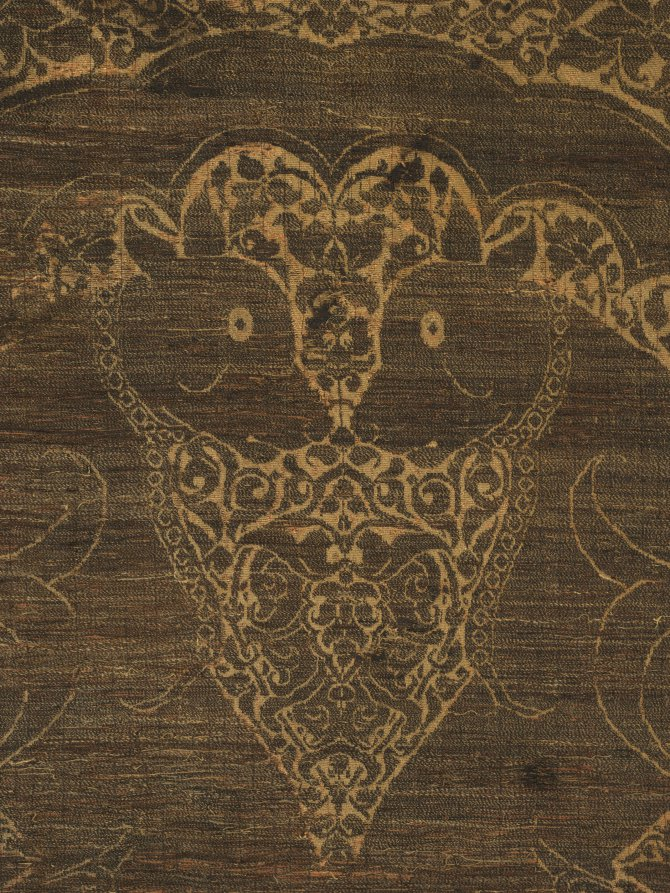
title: Cloth of gold with felines and eagles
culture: Northeast Iran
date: 1225–75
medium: Silk and gold thread: lampas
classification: Textile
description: Mongol taste for luxury was equated with gold, symbol of imperial authority, power, and legitimacy. This splendid cloth of gold-exceptionally large and luxurious-may have enriched the interior of a palace or a majestic tent. The golden pattern, although tarnished on the faded red silk ground, features scalloped medallions with felines whose long tails terminate in dragons’ heads amid elegant floral vines. Double-headed eagles form interstitial motifs on the floral ground. A radiant gold-on-gold band of pseudo-Arabic script enriches the top, woven with gold strips wrapped around a silk core on a ground of flat strips of gold, immediately beneath the pattern testing area.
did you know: Mongol cloths of gold, called nasji, incorporate Iranian, Central Asian, and Chinese features, reflecting the effects of gift exchanges and international commerce.